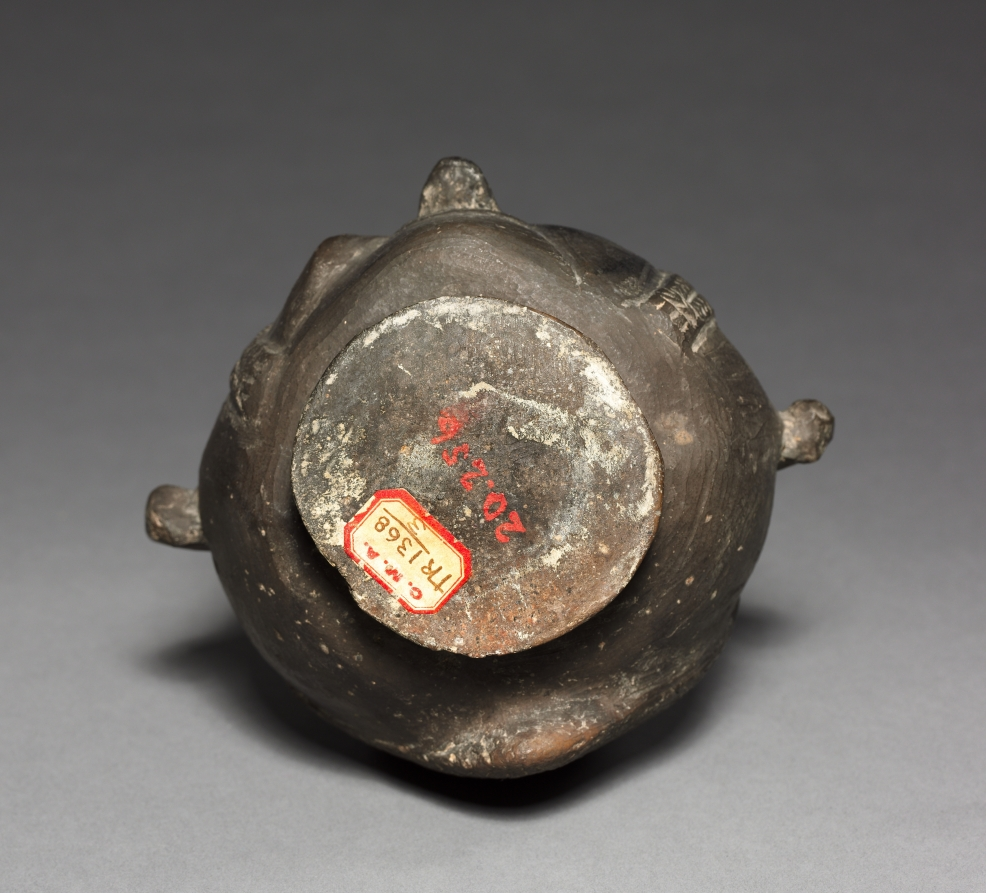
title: Bottle Vase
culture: Peru, Chimú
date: c. 1400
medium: black ware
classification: Ceramic